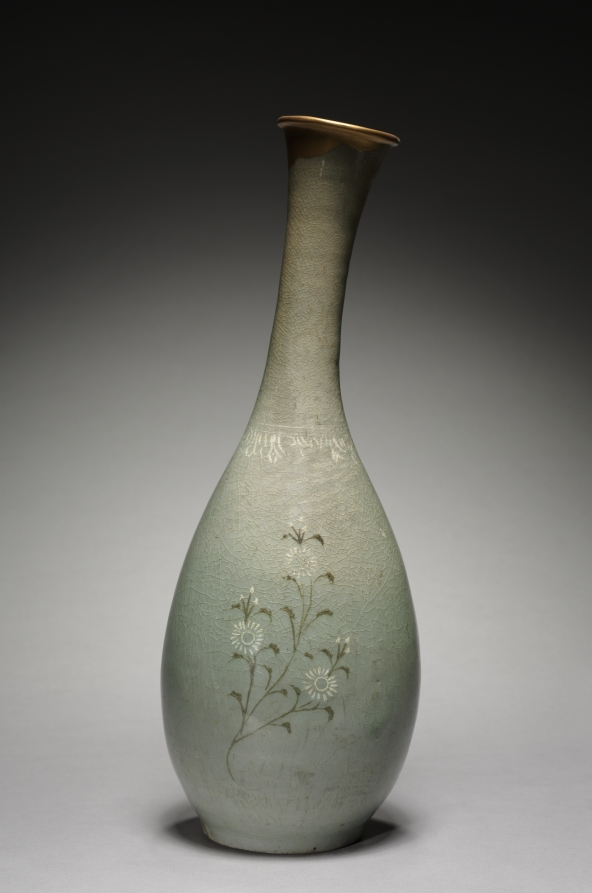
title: Bottle with Chrysanthemum Design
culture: Korea, Goryeo dynasty (918–1392)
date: 1200s-1300s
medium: Celadon ware with inlaid white and black slip decoration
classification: Ceramic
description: This rare long-neck celadon wine bottle is inlaid with white wild chrysanthemums, symbols of both the poem "Drinking Wine" and blessings of longevity. One root has three stems with tiny white blossoms. The damaged lip was repaired with gold lacquer. Korean Celadons Repaired with Gold Termed kintsugi (literally meaning “gold joinery”) in Japanese, this method of repair highlights broken parts with glittering gold mixed with lacquer. Initiated in 15th-century Japan, the technique follows a popular aesthetic concept called wabi-sabi, which finds beauty in imperfect things and continued to be practiced throughout the modern period in East Asia. Goryeo celadons were considered extremely rare treasures among modern collectors; thus, the broken condition of these examples is brilliantly highlighted in gold lacquer on the repaired spouts, handle, and lid.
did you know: Termed kintsugi (literally meaning “gold joinery”) in Japanese, this method of repairing broken parts with glittering gold mixed with lacquer was extensively used for ceramic works in the Goryeo period, such as this one.